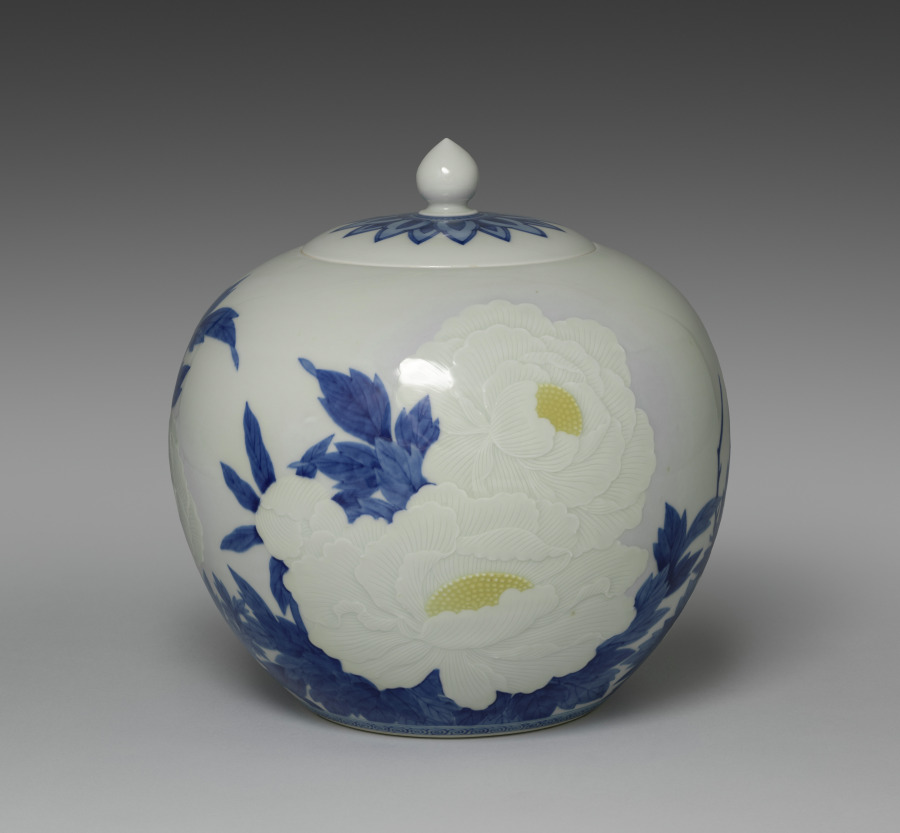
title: Lidded Jar with Peonies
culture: Japan, Meiji period (1868–1912)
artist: Seifū Yohei III (Japanese, 1851–1914)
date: 1897–1912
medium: Porcelain with molded and carved design and underglaze color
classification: Ceramic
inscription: 大日本清風造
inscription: 金聲玉振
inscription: 帝室技芸員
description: The petals of the large, white peonies on this jar were made by applying molded clay to the body and incising the clay with lines for definition. The flowers’ centers were then painted with yellow, along with the leaves in cobalt blue line and wash. A subtle blue gradation was also added all around the flowers using a masking method. The lid, with its treasured jewel-shaped finial, was also decorated with foliate motifs in underglaze cobalt blue. Finally, a transparent glaze was applied over the entire body of both the jar and lid. It is a special demonstration of Yohei III’s use of precision and control to create a completely balanced composition.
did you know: Seifū Yohei III drew inspiration from Qing dynasty Chinese wares but experimented widely with new glazing techniques.